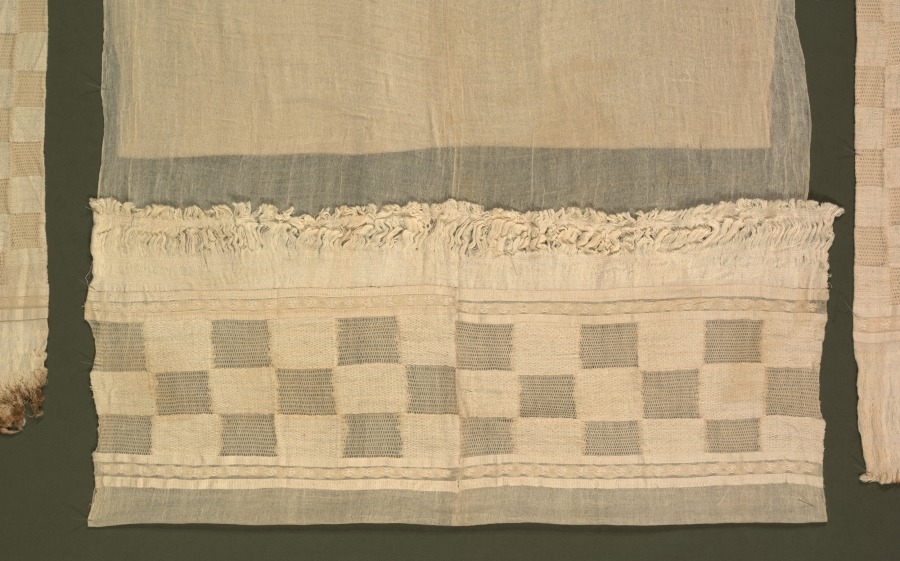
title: Loincloth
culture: Peru, North Coast, Chimú style, 1200–1460s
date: 1425–1500 (radiocarbon date, 92.3% probability)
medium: cotton; plain weave, brocaded and complex alternating gauze with 5 shots of plain weave between gauze shots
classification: Garment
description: Loincloths were basic men’s wear in ancient Peru. But the extraordinary size of some examples—this one is about eight feet long, unfolded—makes it difficult to know how they were worn, except that they were tied around the waist with the decorated panels hanging at the front and back of the body. The appearance may have been that of a billowing skirt.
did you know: This loincloth is huge!